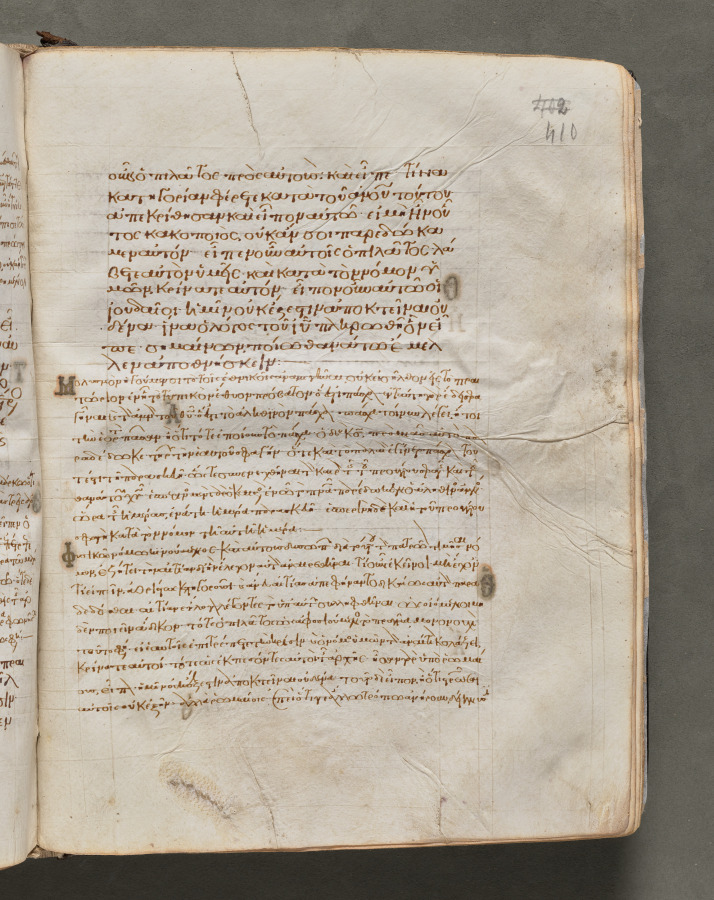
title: Text, folio 410 (recto), from a Gospel Book with Commentaries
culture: Byzantium, Constantinople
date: c. 1000–1100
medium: ink, tempera, and gold on vellum; leather binding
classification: Bound Volume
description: Each of the four gospels in this book opens on a page with brilliantly illuminated borders depicting the author of the text as well as birds—principally peacocks, symbols of the immortality of the soul—and fountains, representing the fountain of life and the salvation of the soul. This volume consists of 428 leaves with texts in Greek. Its level of sophistication suggests that it was probably written and decorated in a monastery in Constantinople.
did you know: Gospel books were carried in procession through Byzantine churches.